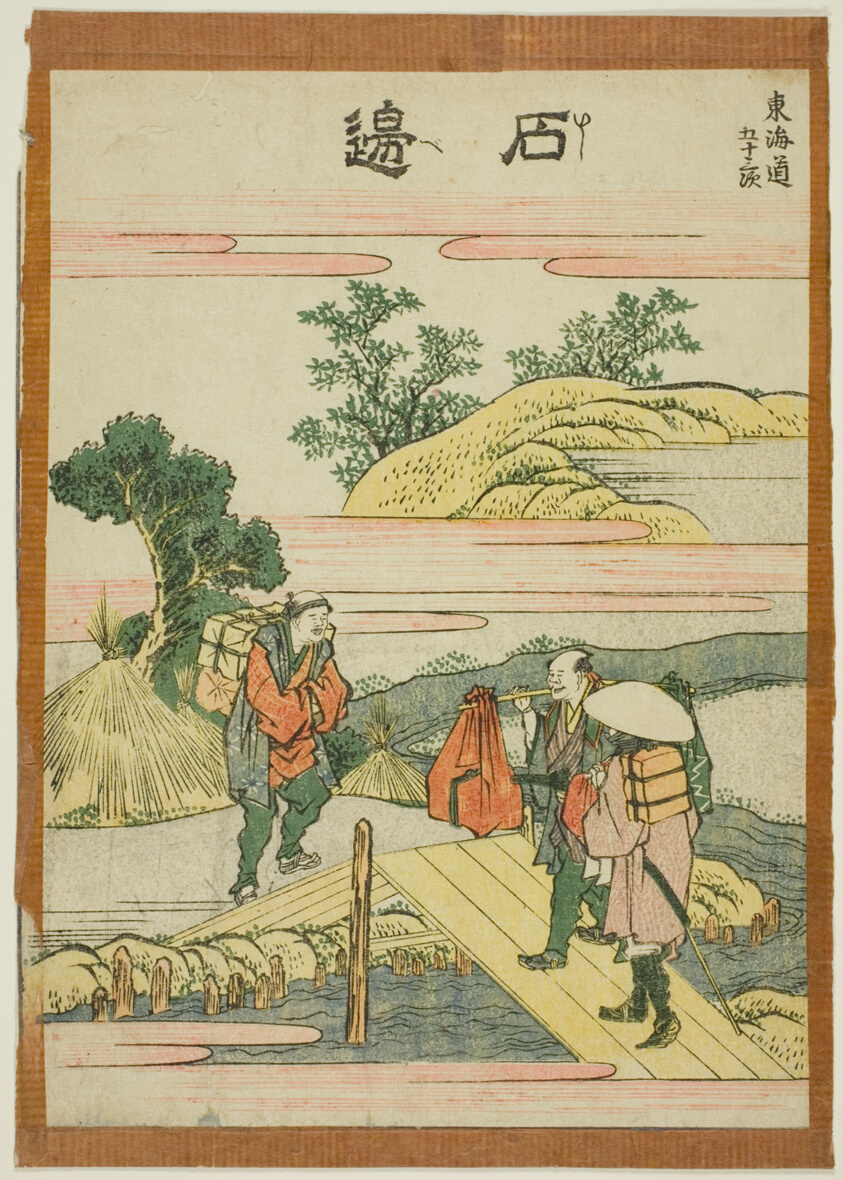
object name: Print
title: Ishibei, from the series "Fifty-three Stations of the Tokaido (Tokaido gojusan tsugi)"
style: Japanese (culture or style)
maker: Katsushika Hokusai 葛飾 北斎; Japanese, 1760-1849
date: c. 1806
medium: Color woodblock print; chuban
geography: Japan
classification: woodblock print; print; asian art